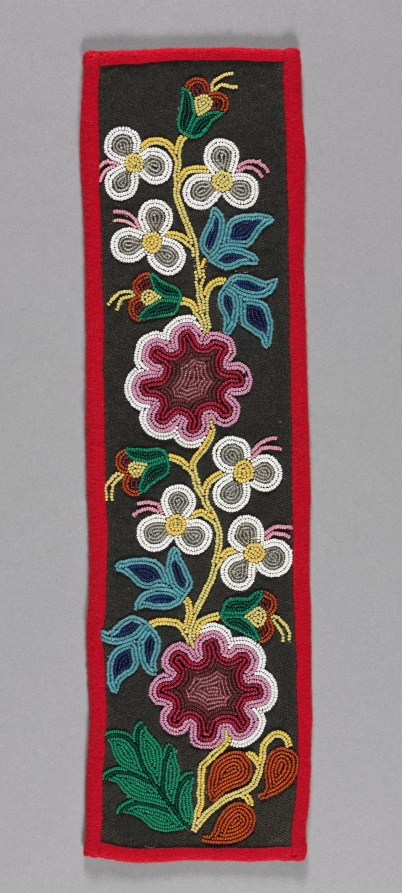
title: Two Beaded Panels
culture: Northeast Woodlands, Great Lakes Region, Anishinaabe (Ojibwe) or Nehiyawak (Cree) People?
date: late 1800s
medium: glass beads on wool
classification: Textile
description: In the 1800s, native peoples began to use European fabrics to fashion fine formal garments; they favored sturdy cloth, such as velvet and wool broadcloth, which provided support for heavy decorative beadwork that was added by hand. Often the fabric was a dark color, providing dramatic contrast for the multicolored beads. Rather than encrusting the entire garment, beadwork was confined to cuffs, “epaulettes,” bib-like plackets and yokes, rectangular panels sewn to leggings, shirts, and dresses, and the like.